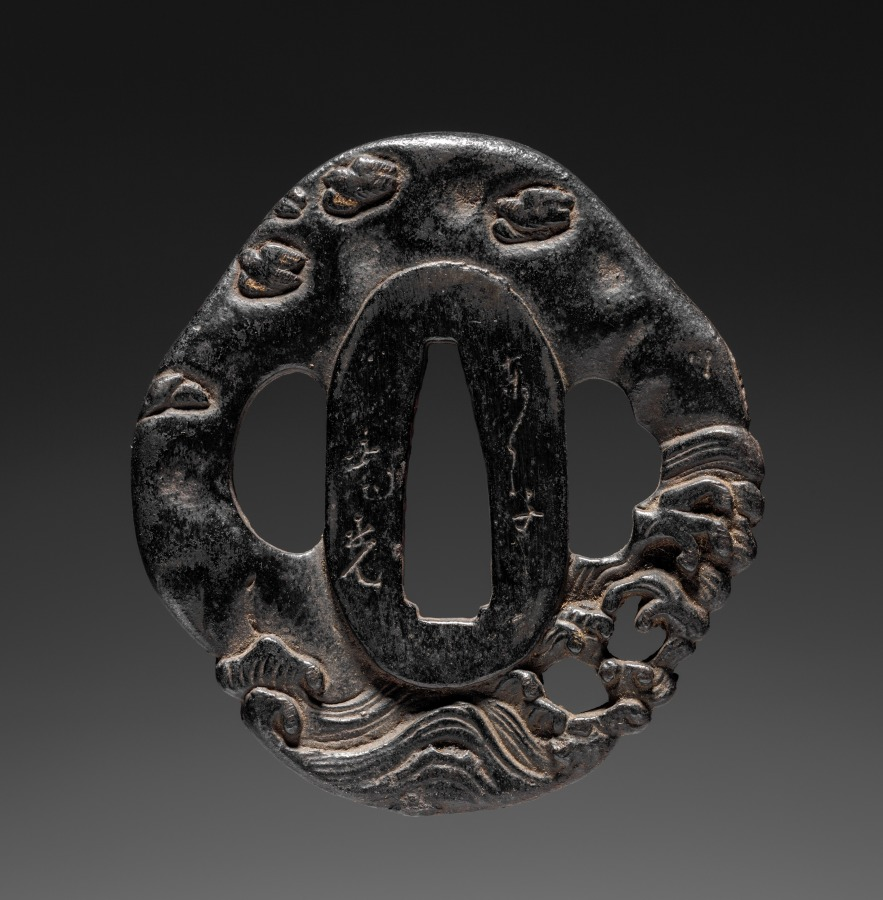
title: Sword Guard (Tsuba) with Plovers in Waves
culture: Japan, possibly Edo period (1615-1868)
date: c. 1615–1868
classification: Arms and Armor